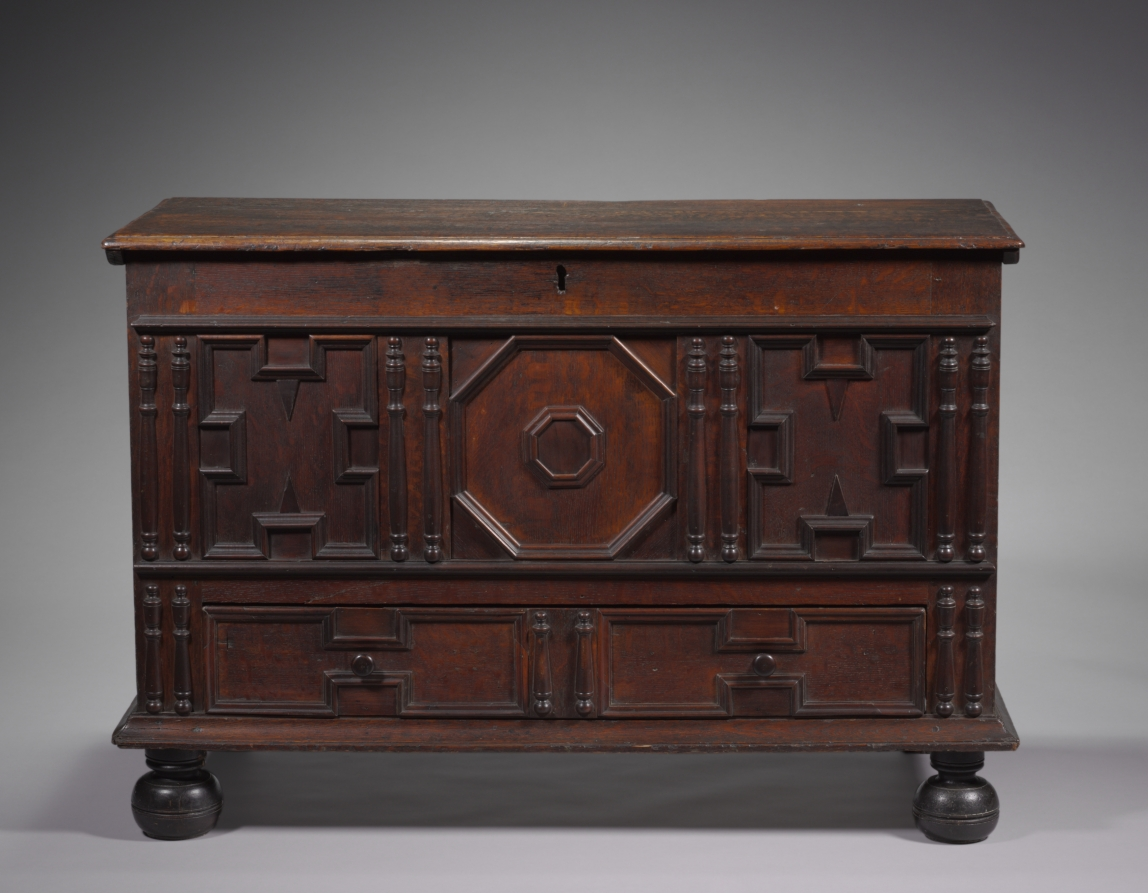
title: Chest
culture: America, Massachusetts, perhaps Salem, 18th century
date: c. 1700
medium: oak and pine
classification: Furniture and woodwork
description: This lift-top chest, with its decorative panels defined by moldings, may be associated with furniture made by John Symonds and his sons of Salem, Massachusetts. The thin, "split spindle" decorations are made by gluing two separate pieces of wood together and then splitting them after turning (shaping on a lathe).